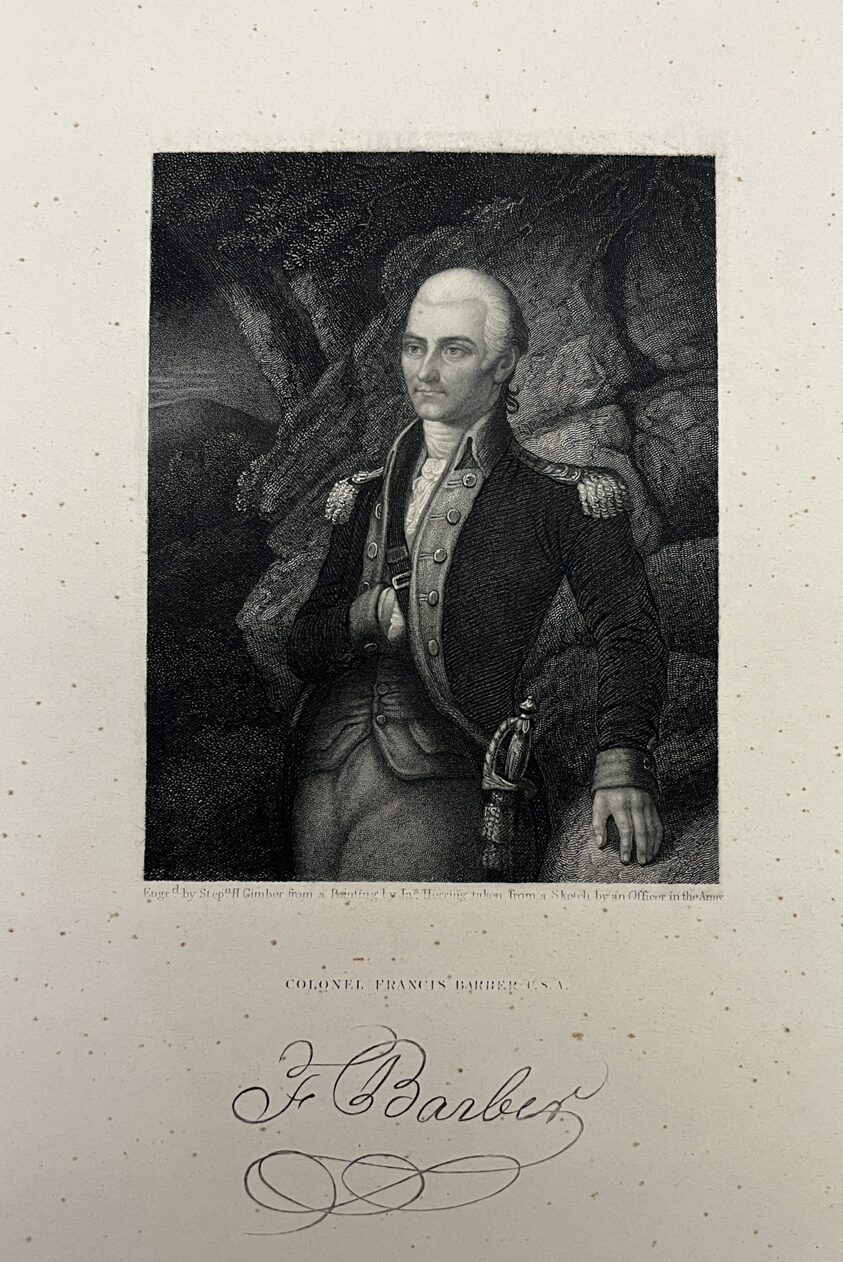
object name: Print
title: Colonel Francis Barber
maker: Stephen Henry Gimber (American, c. 1806-1862); after James Herring (American, 1794-1867); after Artist Unknown (American, 19th century)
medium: Stipple engraving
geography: United States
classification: reproduction; print; prints and drawing